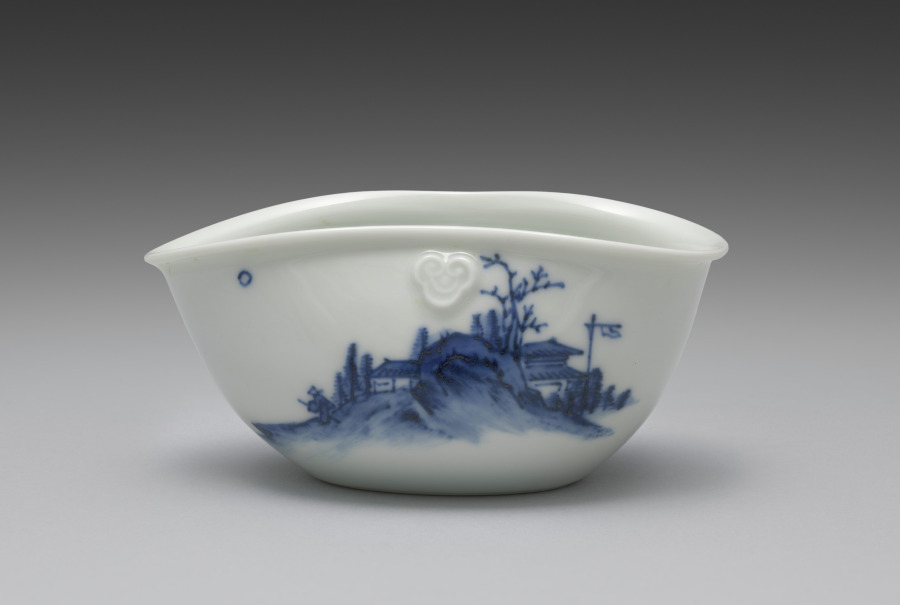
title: Water Cooler from Tea Set with Chinese Landscape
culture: Japan, Meiji period (1868–1912)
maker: Seifū Yohei III (Japanese, 1851–1914)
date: 1893–1914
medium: Porcelain with underglaze blue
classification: Ceramic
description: The kidney-shaped water cooler, yuzamashi, has a scene of a man gazing at a full moon in a dramatic mountain-scape stretching before a large compound in the woods. Another man, hunched over and carrying a heavy parcel tied to a pole over his shoulder, struggles to make his way up a hill to the site. The cooler also has a pair of applied nyoi staff-head forms for resting the tips of one’s thumb and index finger.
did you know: This is a yuzamashi, a container used to cool boiled water to just the right temperature for the best flavor when steeping.